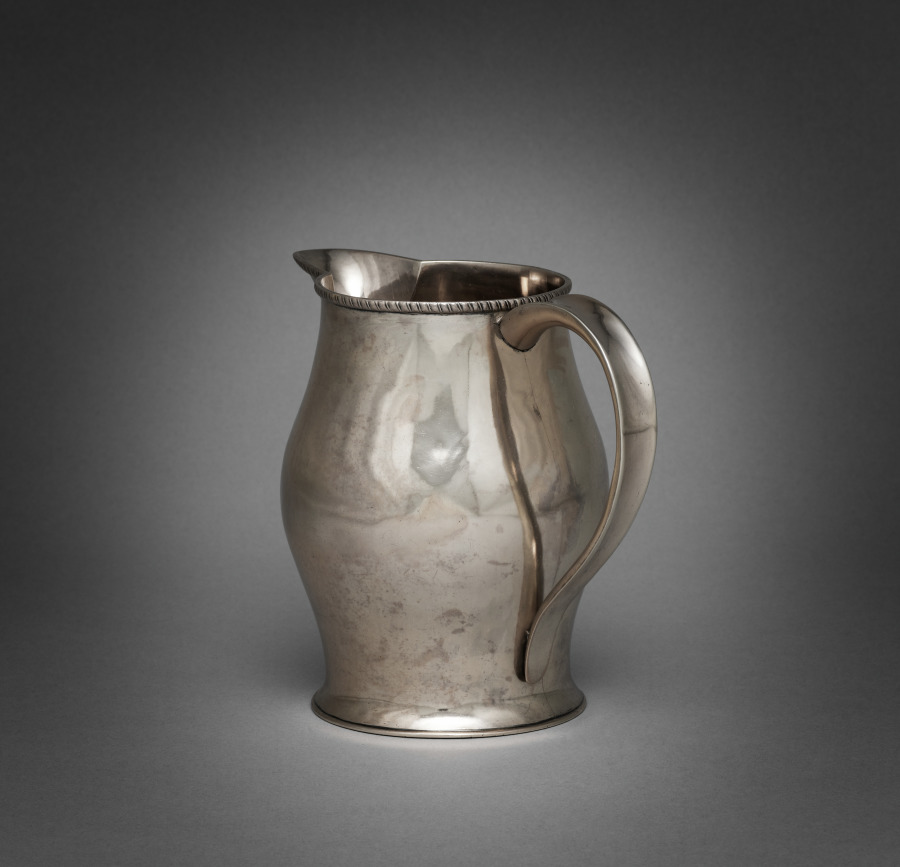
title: Pitcher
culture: America, probably Massachusetts, 19th century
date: 1800–1810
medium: silver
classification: Silver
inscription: Engraved on front side: "C".